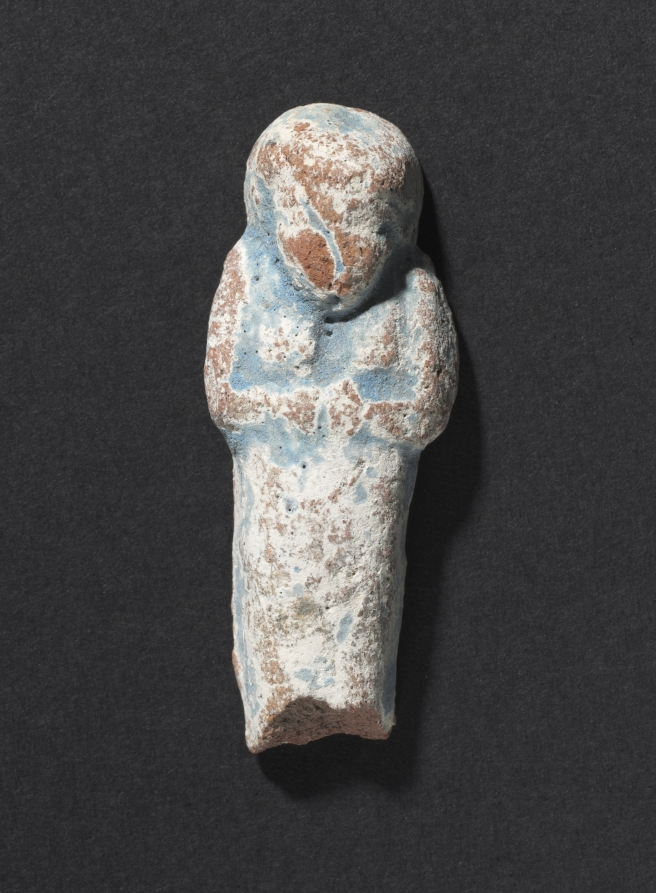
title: Shawabty of Ditamenpaankh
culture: Egypt, Late period (715–332 BCE), Dynasty 25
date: 715–656 BCE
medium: terracotta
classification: Funerary Equipment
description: High demand for shawabtys in the Late Period, a time when as many as 400 or more shawabtys were placed in the tomb with the deceased, gave rise to a specialized container for storing them: the shawabty box. This example is inscribed for the lady of the house, Ditamenpaankh, and was probably one of a pair originally made for her. The single-masted boat on the box's lid is perhaps an allusion to the pilgrimage of the deceased to the holy city of Abydos, the cult city of Osiris, king of the dead. The shawabtys inside are crude, mass-produced examples cast in an open mold. Made of terracotta, their blue paint imitates more costly shawabtys made of faience. As for the shawabty spell, it has been removed from its traditional location on the shawabty's front and relocated onto the sides of box, where it needed only to be written once, thus expediting production.